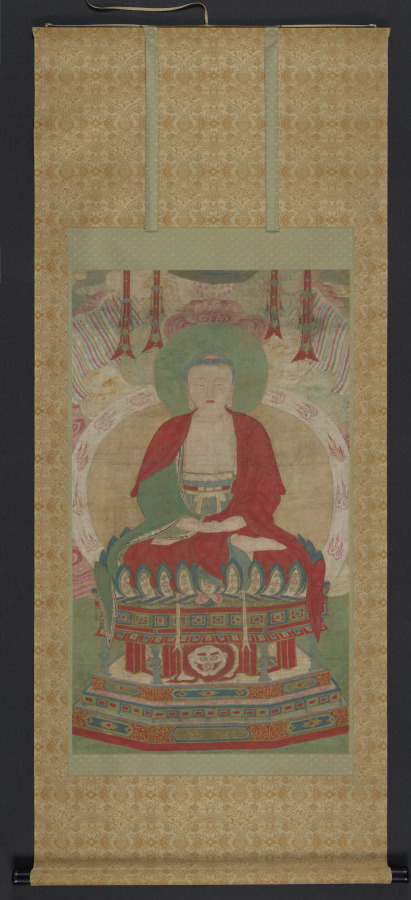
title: Seated Amitābha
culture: Chinese, Ming dynasty (1368-1644)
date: late 1500s–early 1600s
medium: hanging scroll; ink and color on silk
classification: Painting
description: This magnificent Buddha, called Amitābha (literally, “infinite light”) is seated on a lotus pedestal with both palms facing up over crossed legs, suggesting that it is in deep meditation. In contrast to the richly ornamented throne on which the Buddha is seated, the figure itself is devoid of any jewelry or decorative attributes, emphasizing its enlightened status and detachment from worldly affairs. The lion head in the center of the pedestal is a motif from Central Asia, which can also be seen in the halo or nimbus of Chinese Buddhist stone steles.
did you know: Originally, this scroll was acquired by the museum as a Korean work, but has now been tentatively reattributed as Ming period Chinese.